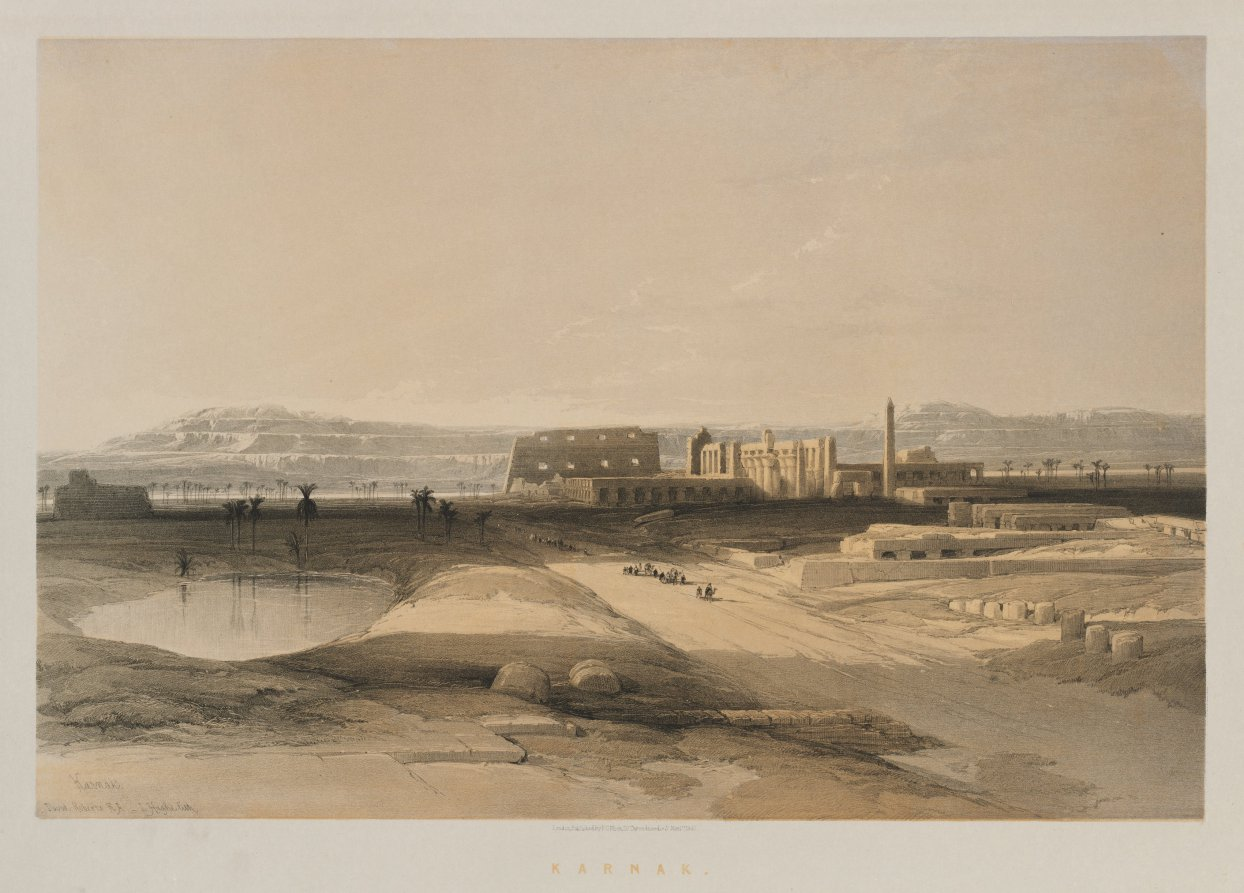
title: Egypt and Nubia, Volume II: Karnak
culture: England, 19th century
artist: Louis Haghe (British, 1806–1885)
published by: F. G. Moon, 20 Threadneedle Street, London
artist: after David Roberts (Scottish, 1796–1864)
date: 1847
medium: color lithograph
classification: Print